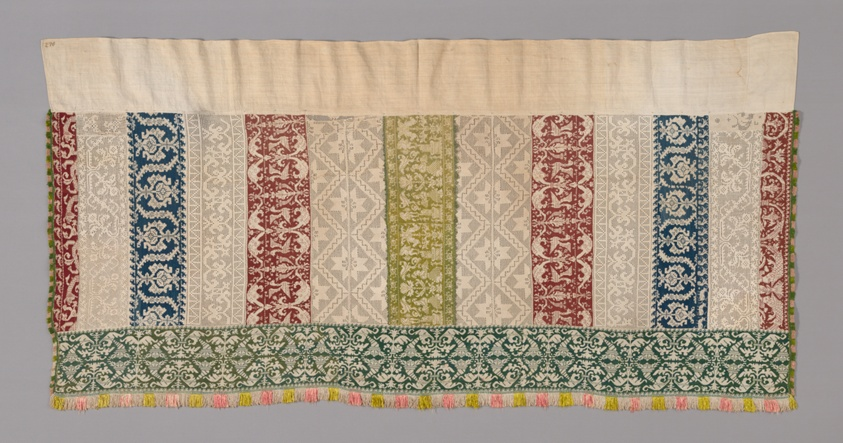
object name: Religious/Ritual Object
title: Altar Frontal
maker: Italy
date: Late 16th century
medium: Bands of linen, plain weave; linen, plain weave; pulled thread work; embroidered with silk in back, four-sided, overcast, running, single faggot, and two-sided Italian cross stitches; and linen, plain weave; pulled thread work; embroidered with linen in Russian overcast and cloth stitches; edged with linen and silk, plain weave extended weft uncut fringe and silk, buttonhole loops and bullion picots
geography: Italy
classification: textile; needlework (visual works); ritual objects